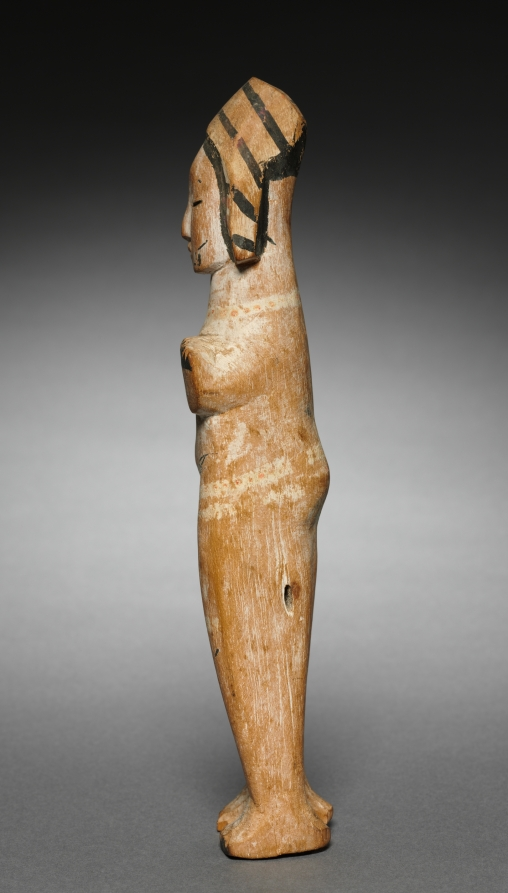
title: Doll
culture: Africa, West Africa, Nigeria, Ibibio style, unknown artist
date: 1900s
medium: Wood, kaolin, and paint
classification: Sculpture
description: Young Ibibio girls would play with dolls for fun. The dolls also took on deeper significance when a girl entered seclusion to go through preparations for adulthood and marriage, representing her future children and promoting her fertility. The kaolin (white clay) that once covered the figures' bodies has been worn off, possibly through handling during play. Thin lines represent uli, a kind of body painting. Upraised, foreshortened hands with open fingers were typical of dolls carved by Ibibio people from the Anang group.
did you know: Dolls like this were sold at markets where they were purchased as symbolic playthings for girls or souvenirs for tourists.